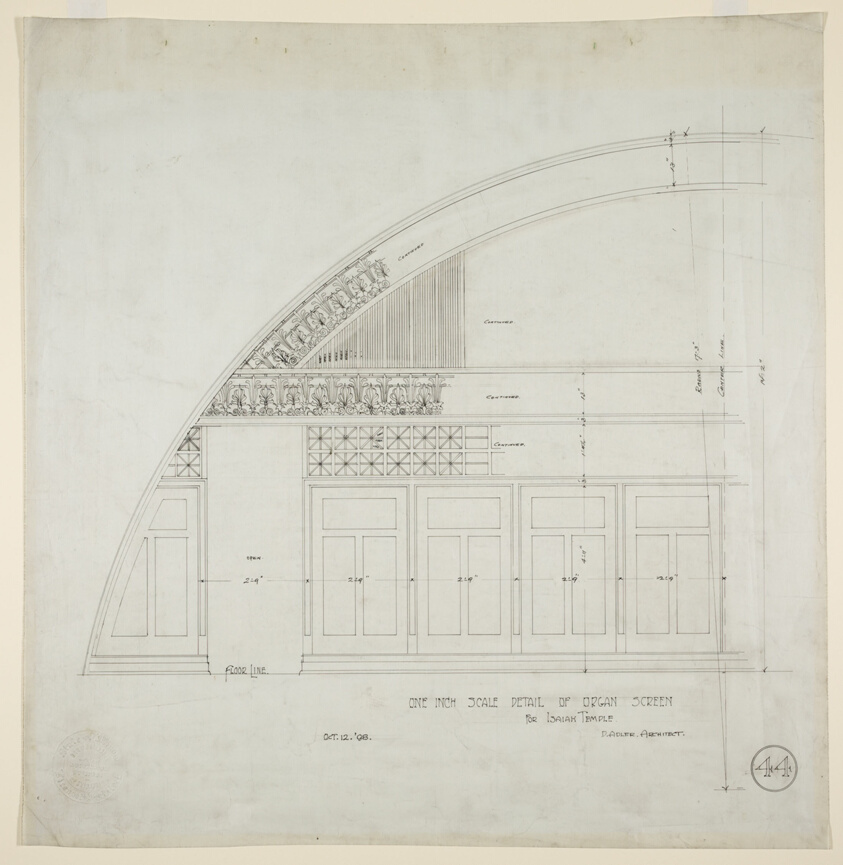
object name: Architectural Drawing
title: Isaiah Temple, Chicago, Illinois, Organ Screen Detail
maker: Dankmar Adler (American, 1844-1900)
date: 1898/99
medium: Black and brown ink on linen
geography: Chicago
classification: architectural drawing